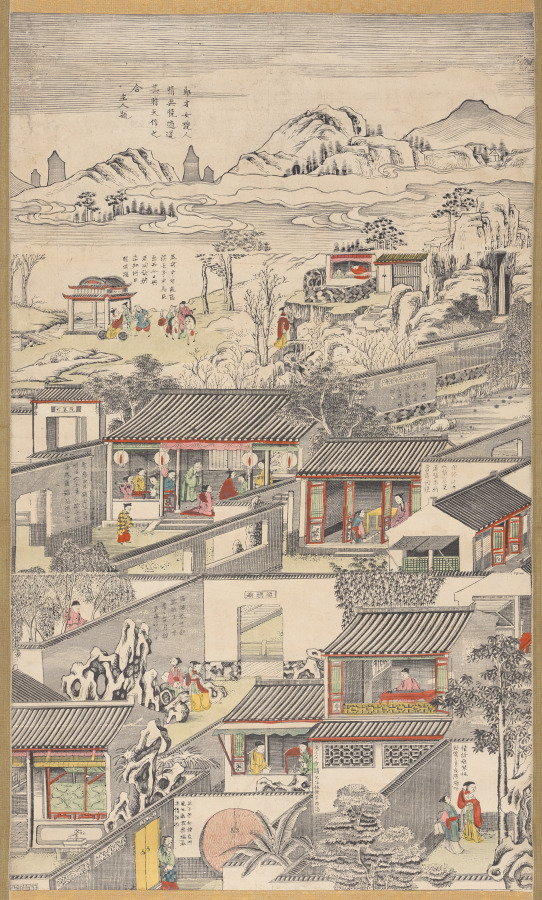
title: Part of Story of The Western Chamber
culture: China, Qing dynasty (1644–1911), Qianlong reign (1736–95)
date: 1736–95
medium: Hanging scroll; polychrome woodblock print; ink and color on paper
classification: Print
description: Woodblock printing in color reached its height in China in the 1600s to 1700s . It was executed by means of sets of separate blocks, each carved to print a different color.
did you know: In the 1600s, printing flourished in such Jiangnan cities as Nanjing, Suzhou, Hangzhou, and Huizhou, evolving from privately enjoyed illustrated books printed in color to more commercialized single-sheet color prints that were hung on walls and became part of the rich urban visual culture.